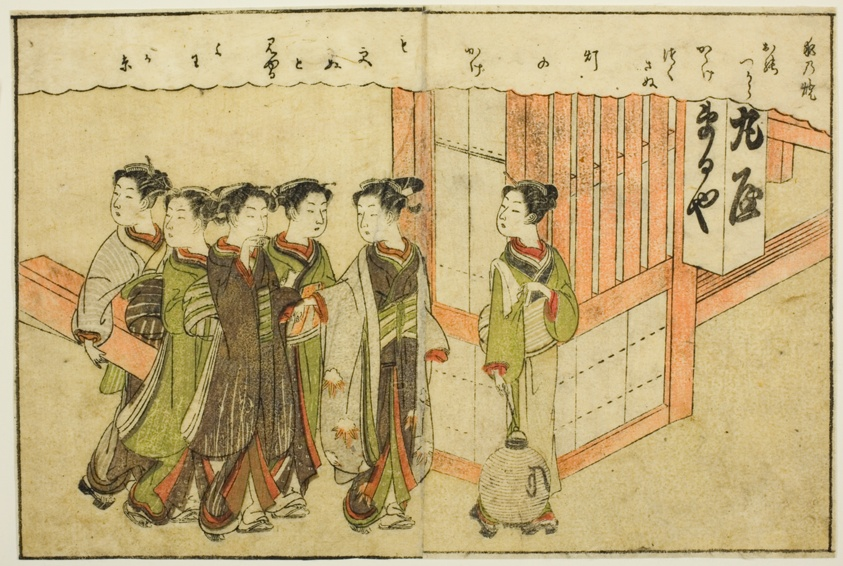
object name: Print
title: Double-page Illustration from Vol. 1 of "Picture Book of Spring Brocades (Ehon haru no nishiki)"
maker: Suzuki Harunobu 鈴木 春信; Japanese, 1725 (?)-1770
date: 1771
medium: Color woodblock print; double-page illustration from book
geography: Japan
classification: woodblock print; print; asian art